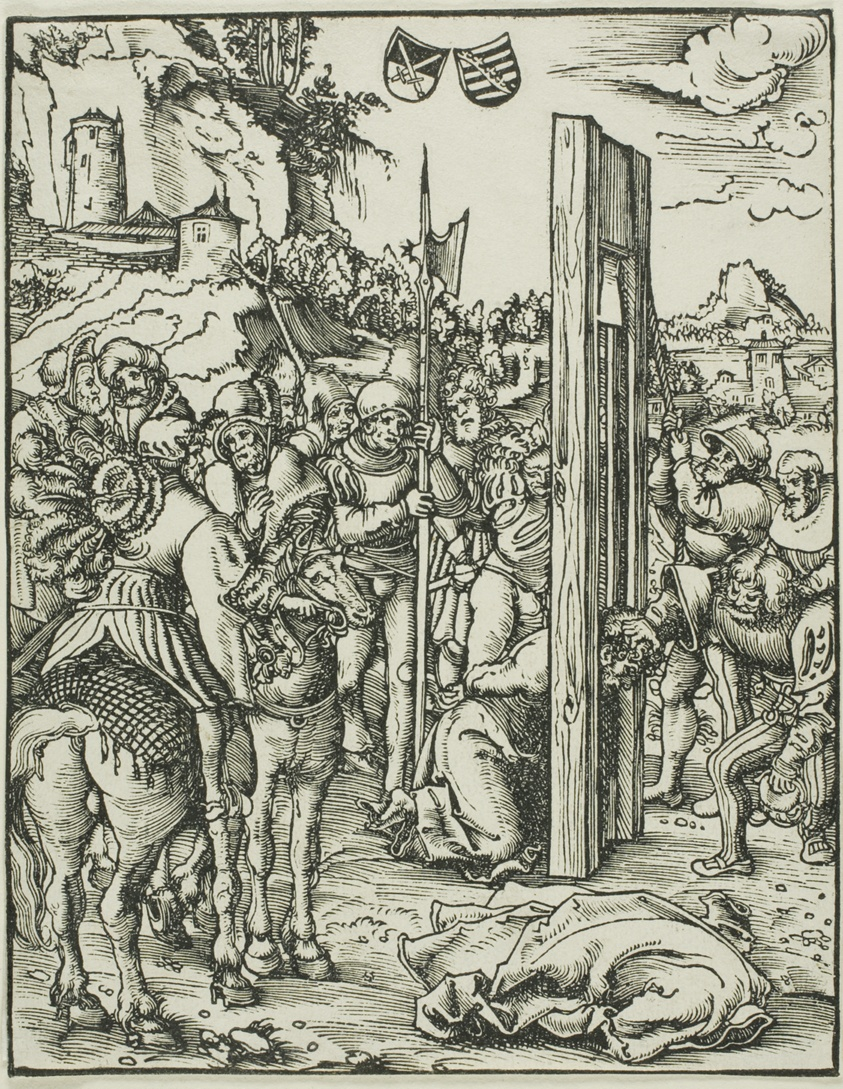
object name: Print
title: Saint Matthias, from The Martyrdom of the Apostles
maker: Lucas Cranach the Elder (German, 1472-1553)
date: c. 1512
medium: Woodcut in black on ivory laid paper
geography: Germany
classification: woodcut; print; prints and drawing